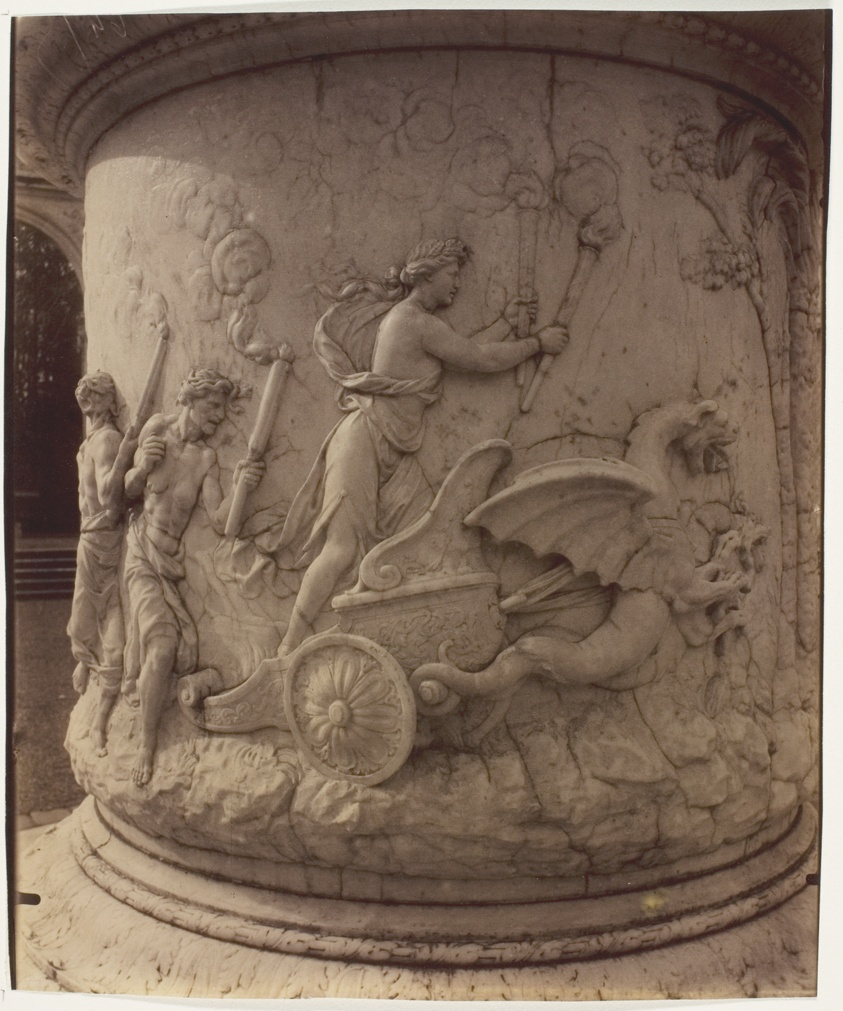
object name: Photograph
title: Versailles, Enlèvement de Proserpine par Pluton par Girardon, (detail)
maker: Jean-Eugène-Auguste Atget (French, 1857–1927)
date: 1904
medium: Albumen print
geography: France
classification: albumen silver print; photographic process; photography; photograph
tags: Collected by Hugh Edwards